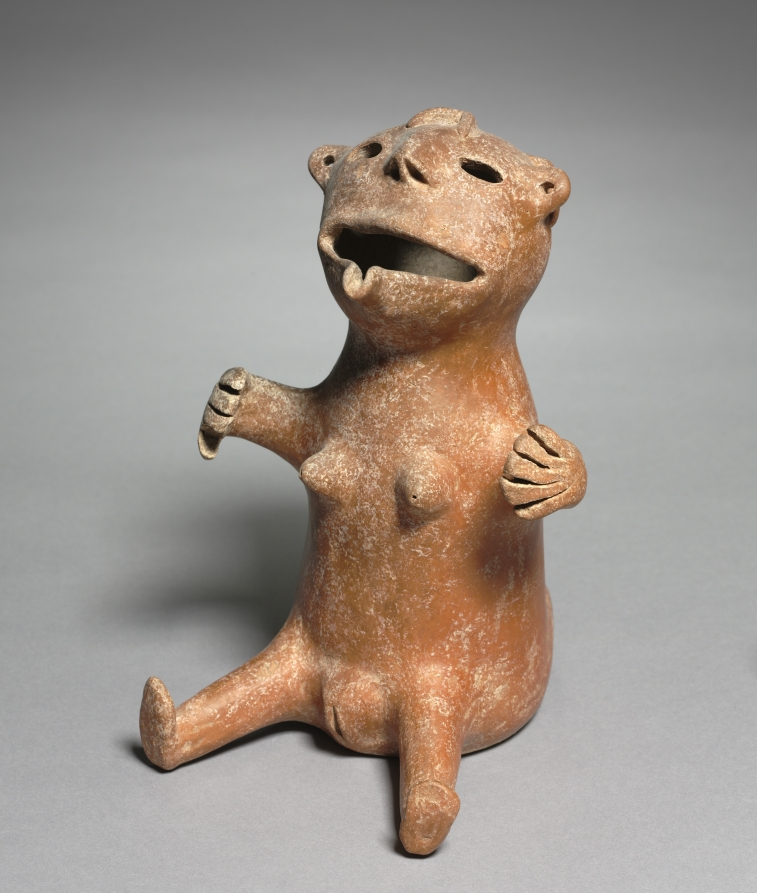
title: "Bear-Woman" Vessel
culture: Iran, Marlik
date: c. 1200–1000 BCE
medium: ceramic, earthenware, burnished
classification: Ceramic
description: The sexual features of this creature have been emphasized so as to guarantee fertility to the woman who drank from it.